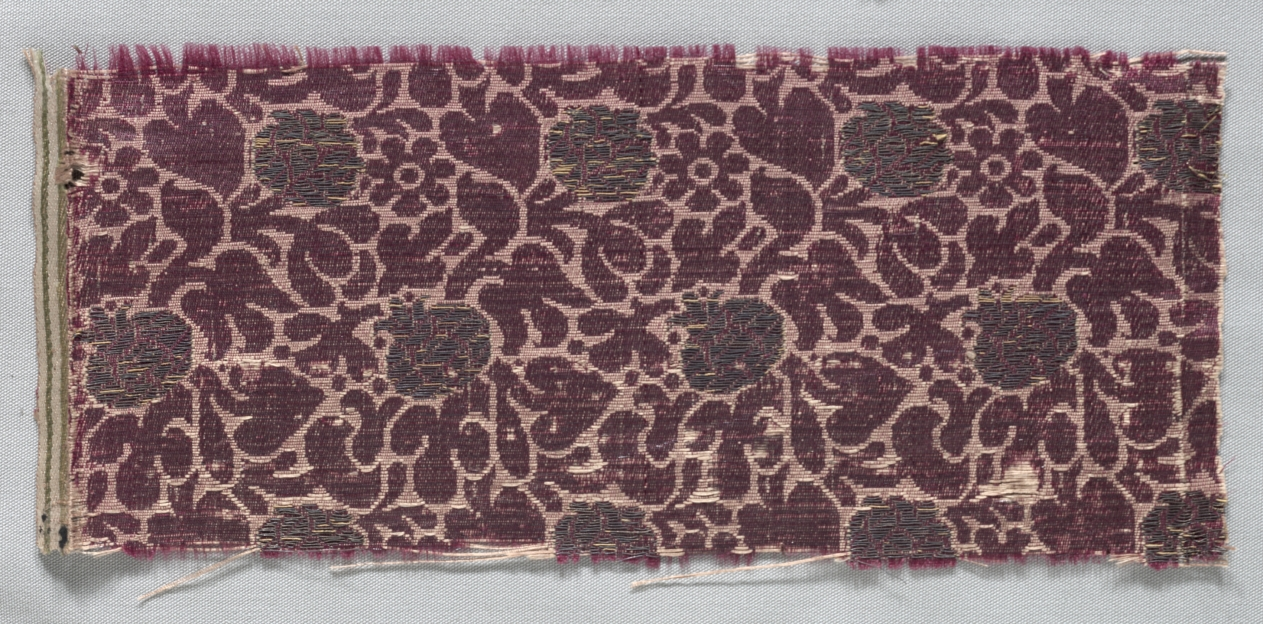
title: Brocaded Textile Fragment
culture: Italy, late 16th - early 17th century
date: late 1500s - early 1600s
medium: brocade; silk and metal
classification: Textile